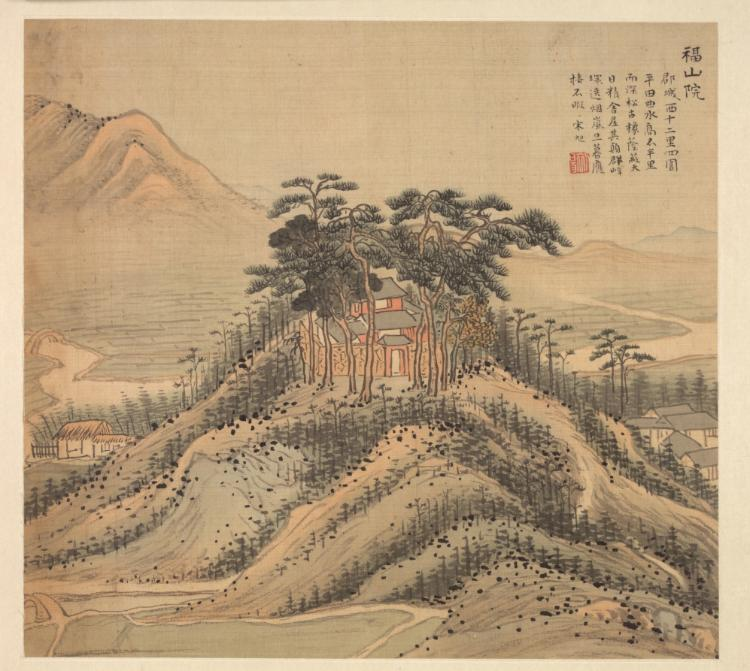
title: Fushan Monastery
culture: China, Jiaxing, Ming dynasty (1368–1644)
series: Eighteen Views of Huzhou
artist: Song Xu (Chinese, 1525-c. 1606)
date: c. 1588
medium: Album leaf; ink and color on silk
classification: Painting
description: By the 1500s, visits to historic and scenic sites in the lower Yangzi delta stimulated an increase of printed illustrated travel books. Topographical depictions of local scenery flourished. Leaves from this album illustrates sites around Lake Tai of the two adjacent counties Changxing and Wuxing (modern Huzhou). Song Xu, who lived intermittently in Jiaxing and Songjiang, must have passed through Wuxing by boat and thus knew the region. The paintings are inscribed with gazetteerlike notations, suggesting that the album was produced for clients as commemorative works, a travel guide, or for “armchair travel” (woyou) in one’s mind.